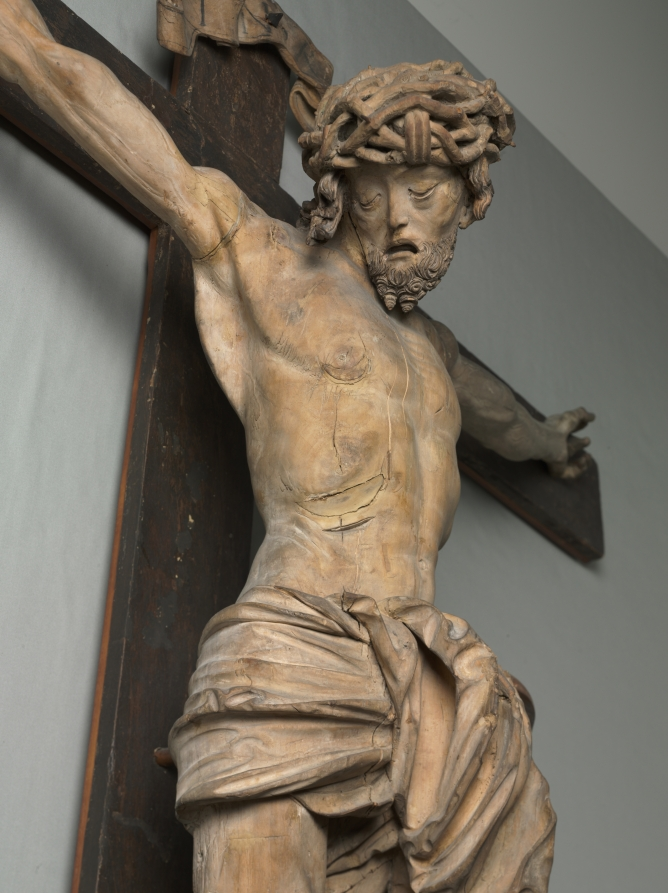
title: Crucified Christ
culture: Germany, Landshut, 16th century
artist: Hans Leinberger (German)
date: c. 1525–1530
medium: lindenwood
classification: Sculpture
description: This sculpture is possibly the best of several crucifixes by this famous sculptor from the Bavarian town of Landshut on the Upper Danube. The pathos and graphic realism with which the artist has modeled the body of Christ ranks this sculpture as one of the artist’s finest works. Leinberger was, along with Matthäus Krennis, an outstanding exponent of the late Gothic style pervasive throughout the Upper Danube area of southeastern Germany during the first decades of the 1500s. This sculpture was probably suspended over the main altar of a church whose origins have not been identified.